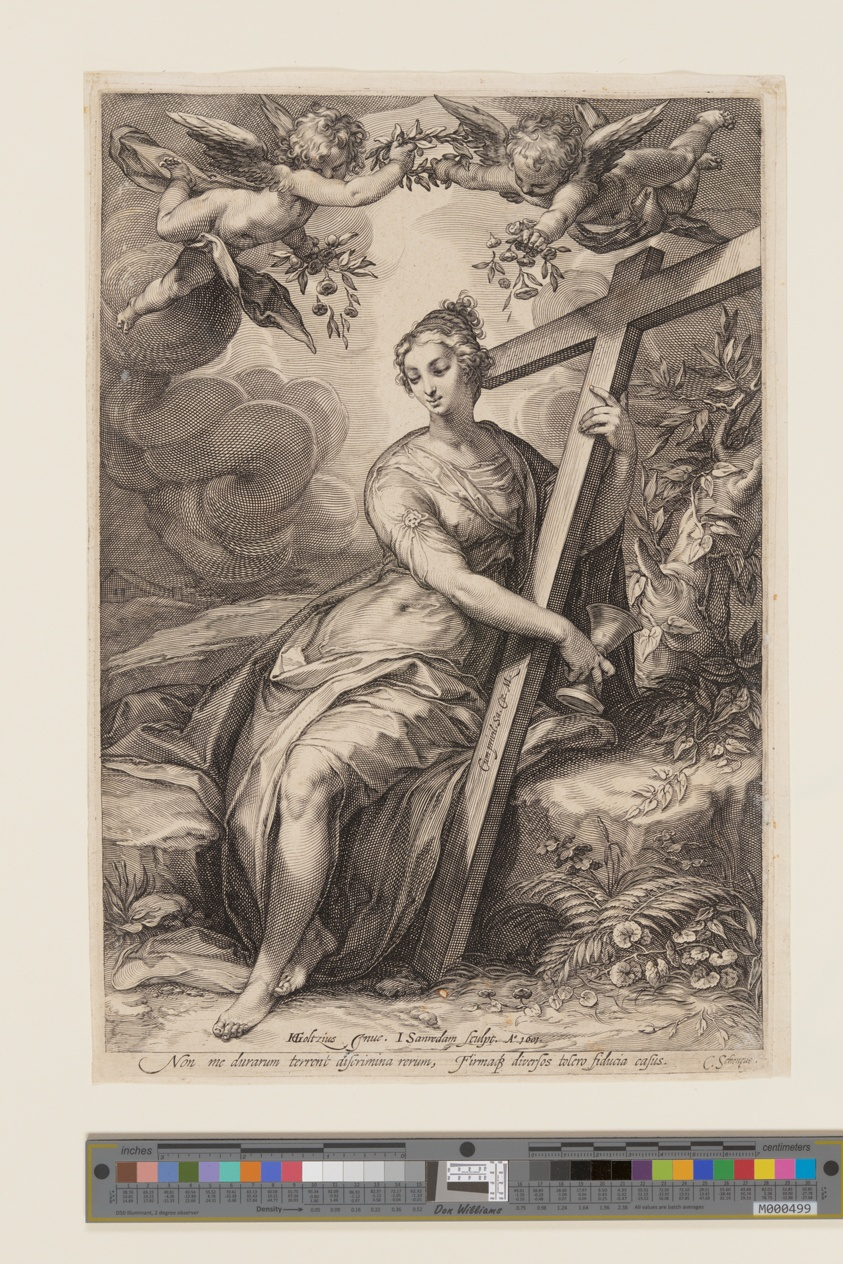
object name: Print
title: Faith, from Three Cardinal Virtues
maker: Jan Saenredam (Dutch, 1565–1607); after Hendrick Goltzius (Dutch, 1558–1617)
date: 1601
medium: Engraving on ivory laid paper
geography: Netherlands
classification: engraving; paper; print; prints and drawing